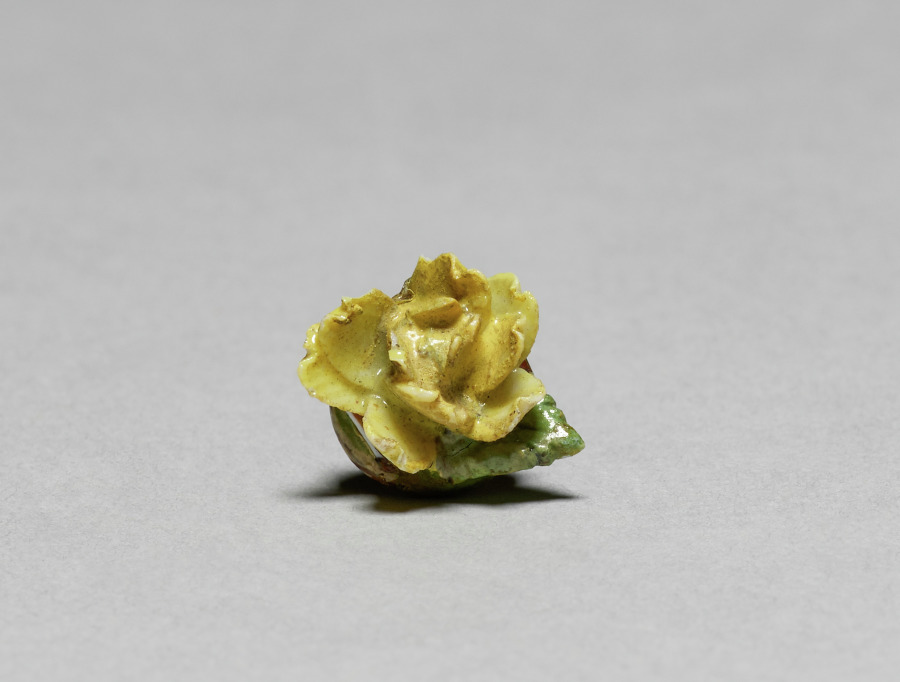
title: Stopper for a Scent Bottle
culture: Germany, Meissen, 19th century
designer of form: manner of Meissen Porcelain Factory (German, est. c. 1710)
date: 1800s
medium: porcelain with gilt metal mounts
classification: Miscellaneous